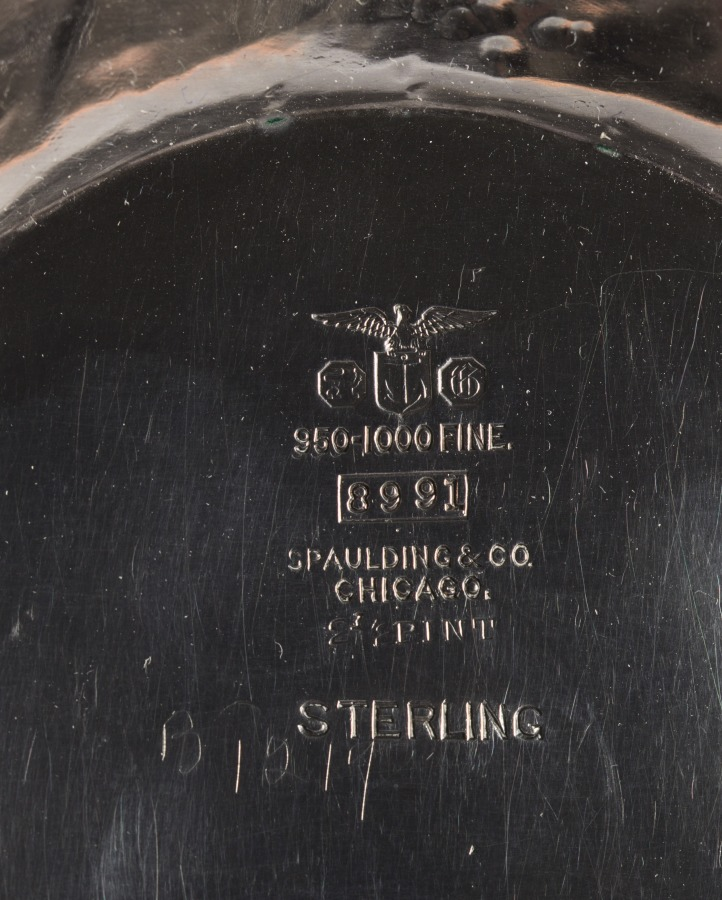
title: Martelé Coffee Service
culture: America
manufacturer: Gorham Manufacturing Company (America, est. 1831)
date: c.1900–1910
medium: silver, ivory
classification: Silver